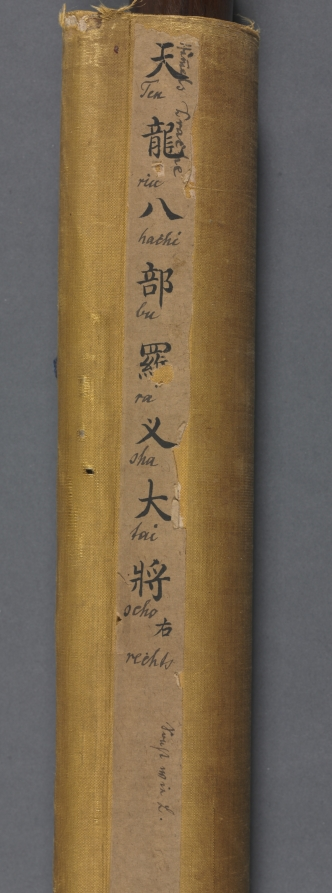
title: The Eight Hosts of Deva, Naga, and Yakshi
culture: China, Ming dynasty (1368–1644)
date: 1454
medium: hanging scroll; ink and color on silk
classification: Painting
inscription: 大明景泰五年八月初三日施 [印] 廣運之寳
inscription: 御用監太監尚義王勤等奉命提督監造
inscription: 天龍八部羅叉女衆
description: The grandest of the Buddhist mortuary rites is the Water-Land (shuilu) ritual. This esoteric ceremony is conducted for the salvation of “all souls of the dead on land and sea.” The ostentatious ritual was performed for imperial ancestors and high officials from the Song (960–1279) to the Ming dynasties and drew large crowds. On the second day of the weeklong ceremony, paintings are hung in the inner altar. This scroll represents the Eight Hosts of Celestial Nagas and Yakshis as described in the Lotus Sutra. Together with CMA 1973.70.1, it belongs to a set of 36 Water-Land ritual paintings that are the finest works of their types known from the Ming period. With their bright, opaque color and fine-line gilt decoration intact and unfaded, both paintings share a remarkable state of preservation.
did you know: The Naga is on the lower right dressed as a king with gold dragons on his blue robe.